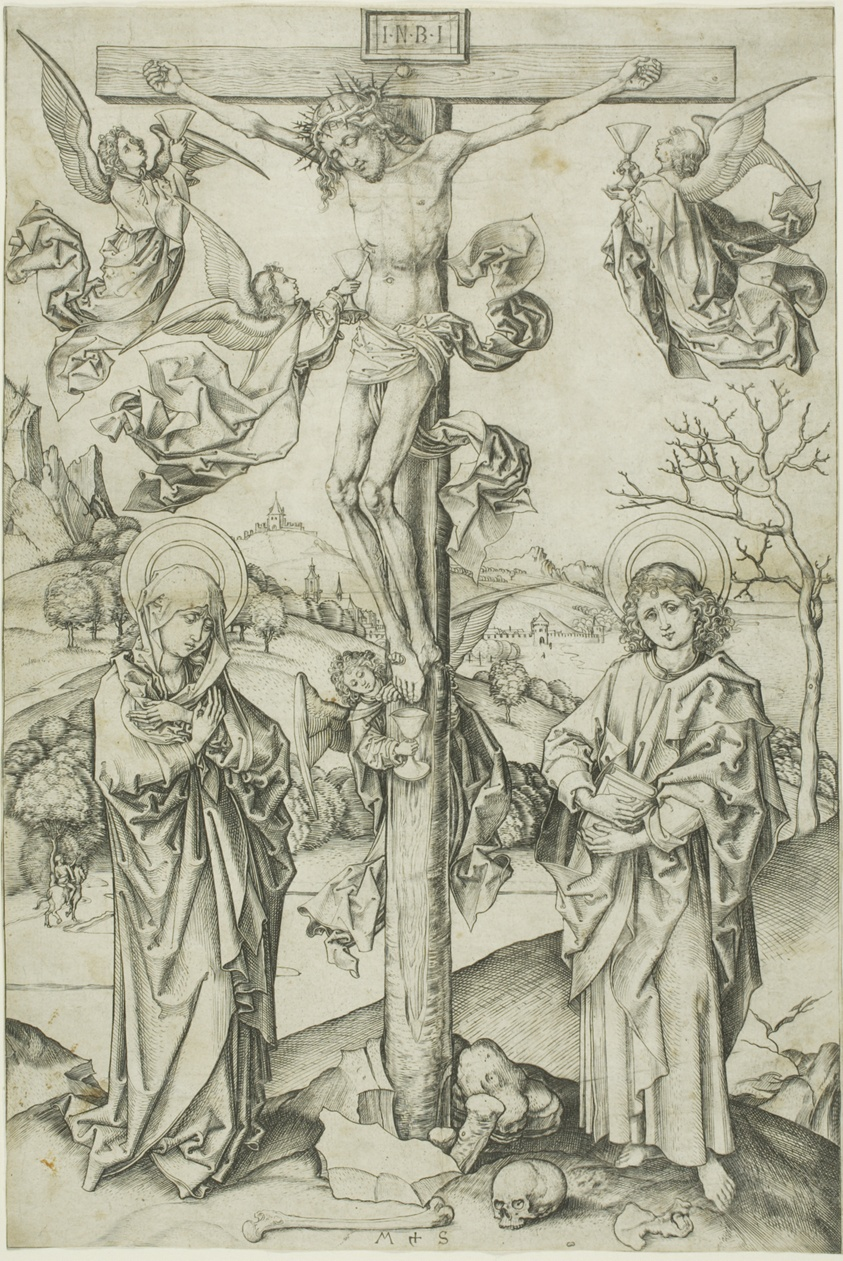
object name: Print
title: The Crucifixion with Four Angels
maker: Martin Schongauer (German, c. 1430/50-1491)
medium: Engraving on paper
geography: Germany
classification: engraving; print; prints and drawing